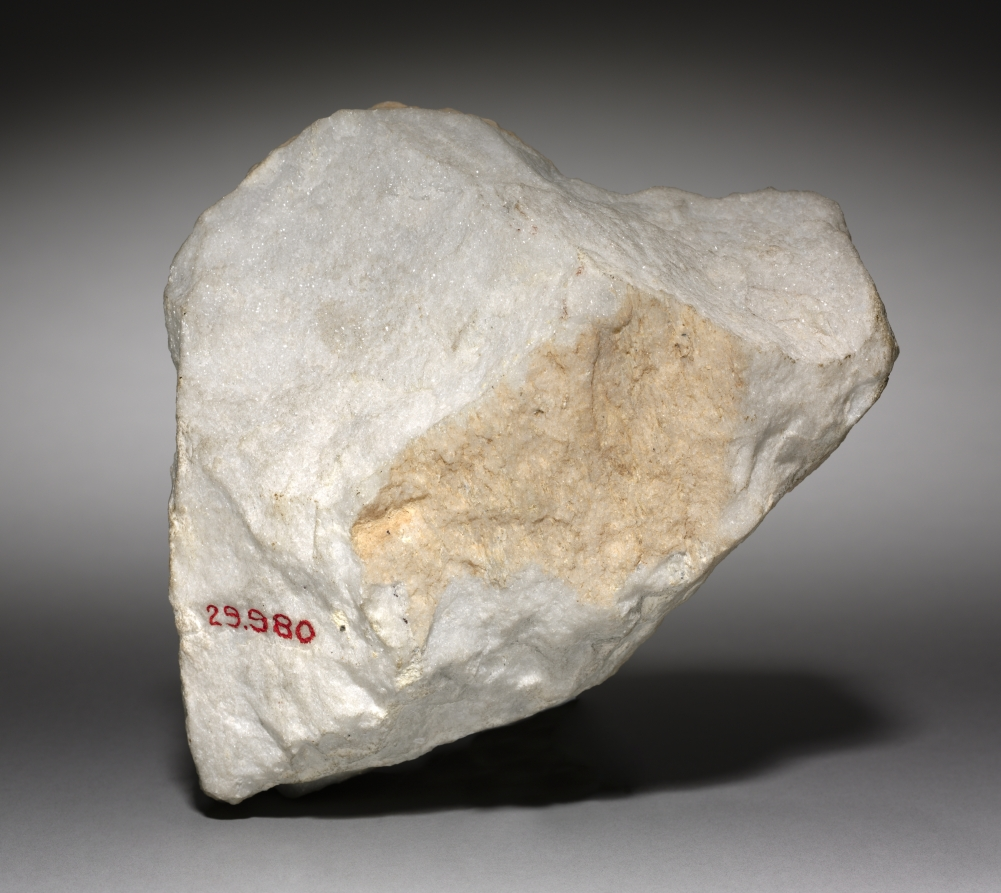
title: Head of a Woman Holding a Sistrum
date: 150 BCE–50 CE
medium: marble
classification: Sculpture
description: This head of a woman was likely originally part of a stele or grave marker. The woman sits in partial profile holding a sistrum close to her head, possibly making music. A sistrum is a type of rattle that originated in ancient Egypt and spread to the Greek world. (View a sistrum in the collection here: 1920.1990.) The sistrum likely signaled to ancient viewers that the woman on the grave marker was a worshiper of the Egyptian goddess Isis, whose cult spread throughout the Mediterranean after Alexander the Great took over Egypt.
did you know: A sistrum (rattle) can have either three or four branches through the body of the instrument.